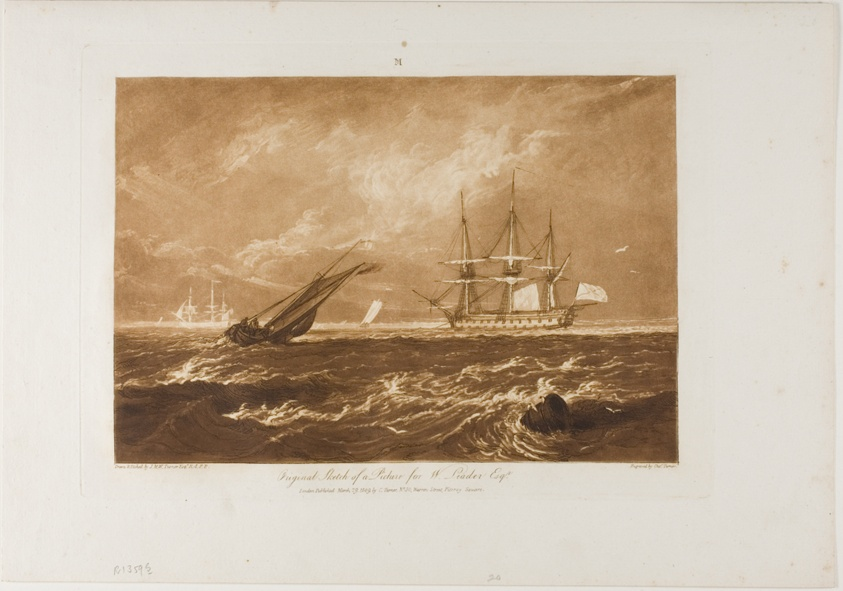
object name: Print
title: The Leader Sea Piece, plate 20 from Liber Studiorum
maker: Joseph Mallord William Turner (English, 1775-1851)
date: published March 29, 1809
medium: Etching and engraving in brown on ivory paper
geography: England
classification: etching; print; prints and drawing